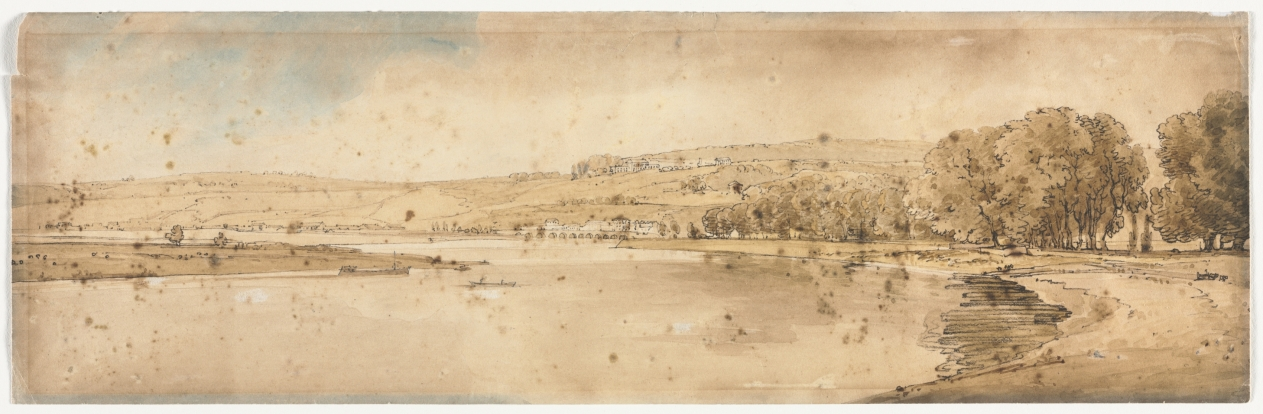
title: A Selection of Twenty of the Most Picturesque Views in Paris: View of Bell Vue and Pont de Sêve taken from the Terrace near Pont de St. Cloud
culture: England, early 19th Century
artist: Thomas Girtin (British, 1775–1802)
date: 1802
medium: soft-ground etching with bistre wash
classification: Print